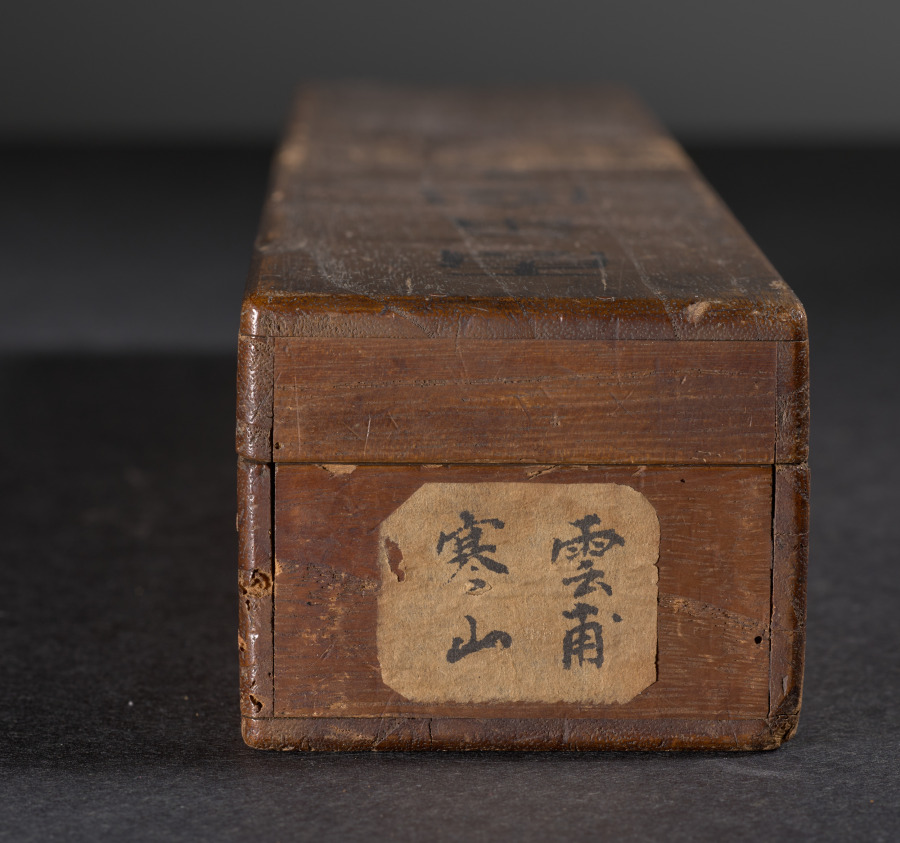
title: Kanzan Holding a Scroll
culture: Japan, Muromachi period (1392–1573)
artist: Unpo Shūkū (Japanese, active 1400s)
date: 1400s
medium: hanging scroll; ink on paper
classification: Painting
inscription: signed: "Unpo"